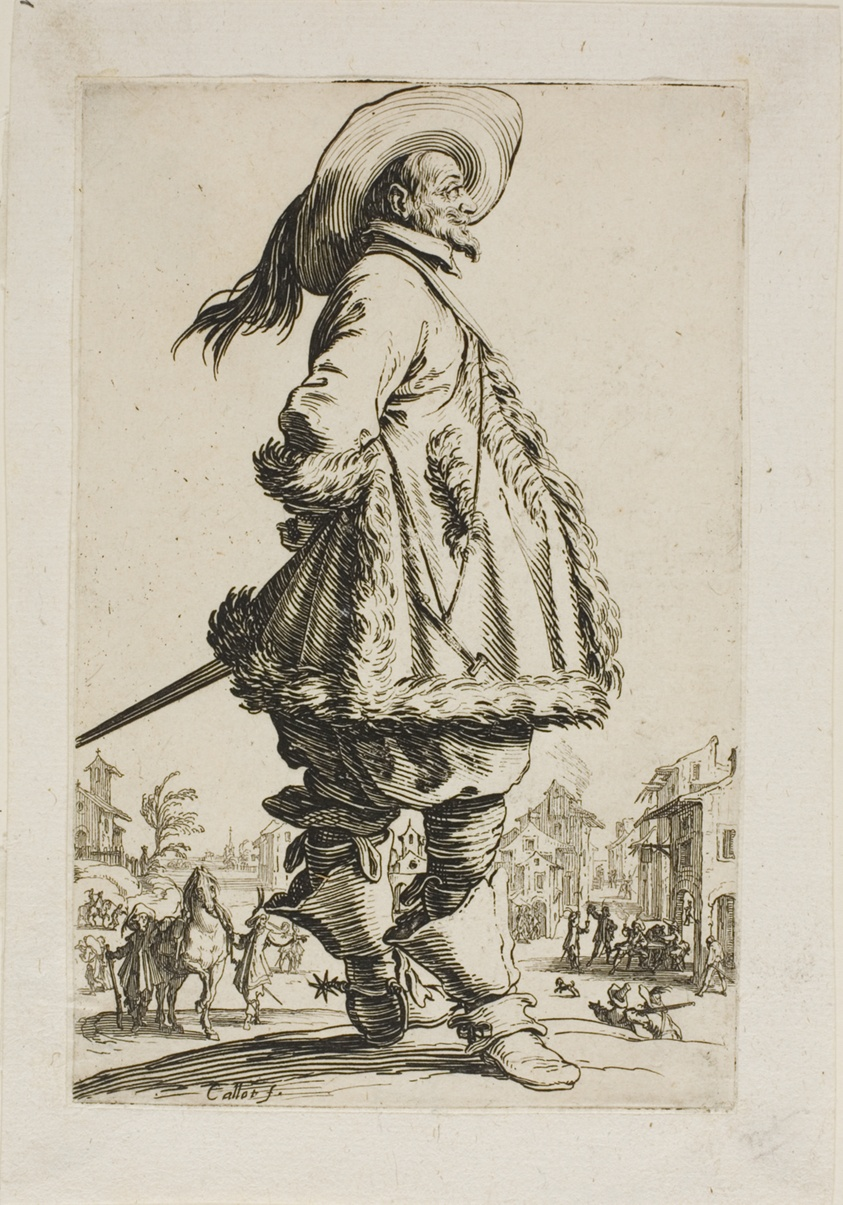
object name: Print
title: The Gentleman in a Fur-Trimmed Mantle, Holding his Hands Behind his Back, plate seven from La Noblesse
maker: Jacques Callot (French, 1592-1635)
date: c. 1625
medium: Etching on paper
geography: France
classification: etching; print; prints and drawing